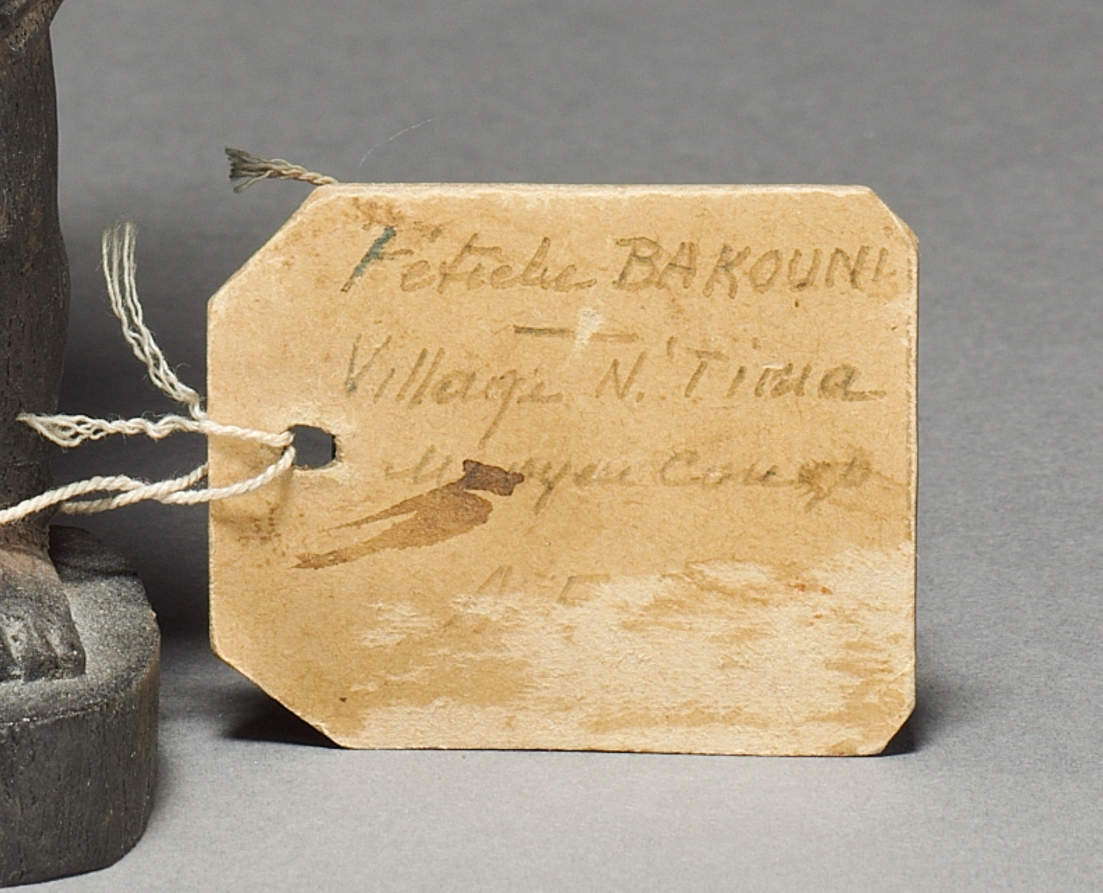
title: Power figure (nkisi)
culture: Africa, Central Africa, Republic of the Congo, Kongo-style maker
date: late 1800s–early 1900s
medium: Wood, feathers, organic material (including resin), iron, and possibly porcelain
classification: Sculpture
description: This figure had lost its nkisi load on the belly, but now shows how the mixture of earth, resin, leaves, glass, and other items was fixed onto the wooden figure, supported by four nails. It had been the property of “the sorcerer of Mboukou.”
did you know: This niksi figurine shows how the mixture of earth, resin, leaves, glass, and other items was fixed. It had been the property of “the sorcerer of Mboukou.”